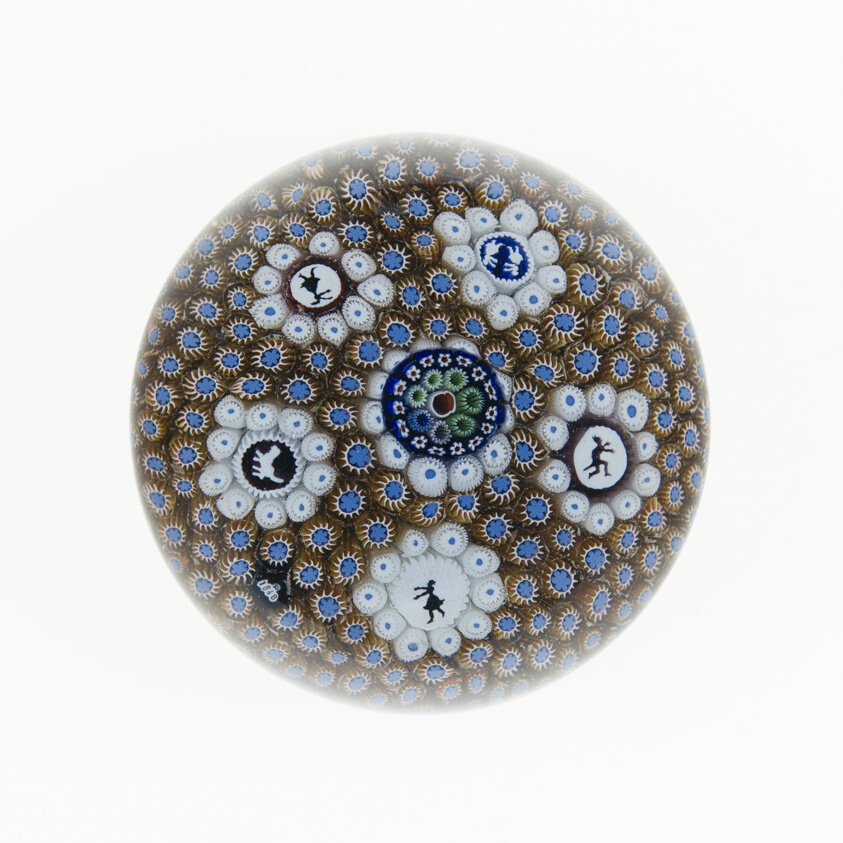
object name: Glass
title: Paperweight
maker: Saint-Louis Glassworks (Cristalleries de Saint-Louis); Lorraine, France, founded 1586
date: 1848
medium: Glass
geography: Saint-Louis-lès-Bitche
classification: paperweight; millefiori; european decorative arts; glass